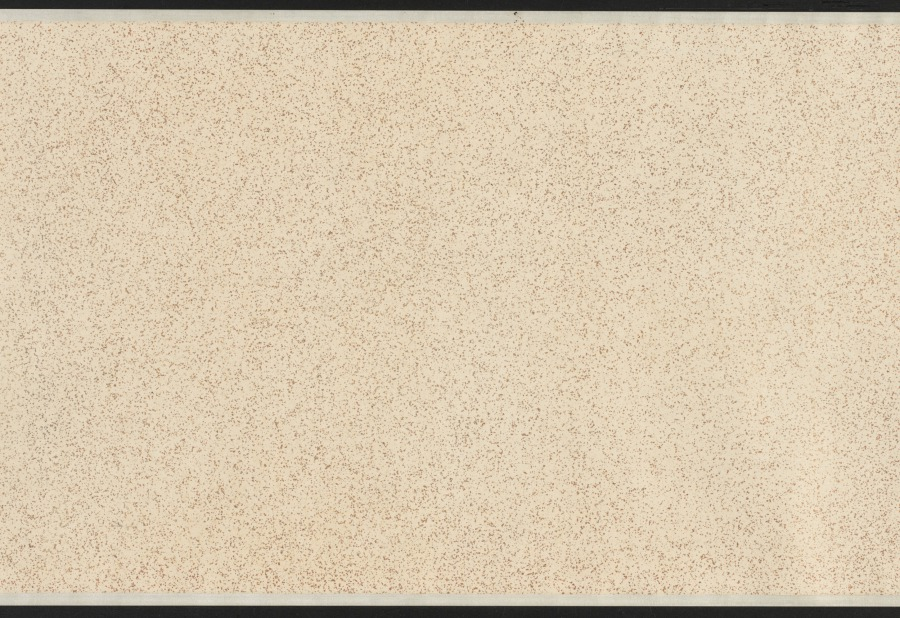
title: Nine Songs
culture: China, Yuan dynasty (1271-1368)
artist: Zhang Wo (Chinese, active c.1336–after 1364)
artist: Chu Huan (Chinese, active 1361)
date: 1361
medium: handscroll; ink on paper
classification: Painting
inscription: 7 colophons and 47 seals: 1 colophon, dated 1361, and 28 seals of Chu Huan 褚奐 (active c. 1361); 1 colophon, dated 1785, and 1 seal of Lu Shihua 陸時化 (1714-1779); 2 seals of Lu Yü-ch'ing (18th c.); 1 colophon, dated 1935, of Ye Gongchuo 葉恭綽 (1881-1968); 1 colophon, dated 1935, of Wu Hufan 吳湖帆(1894–1968); 1 colophon, dated 1938, and 1 seal of Wang Tongyu 王同愈 (1856-1941); 1 colophon, dated 1941, of Wu Huayuan 吳華源 (1893-1972); 1 colophon, dated 1942, and 9 seals of Xu Bangda 徐邦達 (1911–2012); 1 colophon, dated 1942, of Lang Jingshan 郎靜山 (1892-1995); 1 colophon, dated 1944, of Tang Yun 唐雲 (1910-1993); 6 seals of Wang Jiqian [C.C. Wang] 王季遷 (1907–2003).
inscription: Text of The Nine Songs written by Chu Huan at the end of each section.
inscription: 右離騷九歌圖，宋龍溟居士李公本，淮南張渥叔厚所畫妙絕當世。家藏請予書其辭目識于左。至正二十一年辛醜三月旦河南褚奐記。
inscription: Colophon by Lu Shihua 陸時化 (1714–1789): This scroll is fortunate to have been handed down from collections of the right people. Now, after 500 years, its condition is as good as when it was painted. I acquired this from Mr. Shen Guiyu [1673-1769], the President of the Board of Rites. The label is in his handwriting when he was 95 years old. I submit that Chu Huan (t. Shiwen) of the Yuan Dynasty was a native of Qiantang. His "seal" and li writings are in the style of Wu Rui. For example, in [Chu Kuei's] Ming ji lu [A list of masterpieces] is recorded the stele commemorating the restoration of the prefectural school of Kun-shan, the text of which was composed by Yang Weizhen in the twenty-first year of Zhizheng [1361]; and the calligraphy as well as the title in li style was by Chu Huan, who was at that time an assistant judge of the prefecture of Haining in the circuit of Hangzhou. Zhang Wo's zi is Shuhou (叔厚). His literary name is Zhen Qisheng (贞期生). According to [Gu Ying's] Yu shan cao tang ya jii, he liked to paint in the bai-miao or the "pure delineation" style after the method of Li Longmian [Li Gonglin 李公麟], which finds no peer among the ancient masters. This is agreed upon [by Pei Ch'iung] in his Qing jiang zhi who praised [Zhang Wo] as being quite learned and well-versed in many branches of the arts, especially figure painting. Recorded by Lu Shihua [The mountain dweller], listening to the pine, in the twelfth month of the yisi year [1785].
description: Painted in the baimiao, or fine-line drawing style, this ancient work demonstrates the literati’s use of abstract calligraphic brushwork for self-expression. The subject of the “Nine Songs”—songs associated with shamanistic rituals in the ancient Chu kingdom—had traditionally provided artists with myths and legends that they could explore and reinterpret in their own works.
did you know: Divided into eleven sections, the scroll contains illustrations by painter Zhang Wu followed by a transcription of the relevant verse by calligrapher Chu Huan.